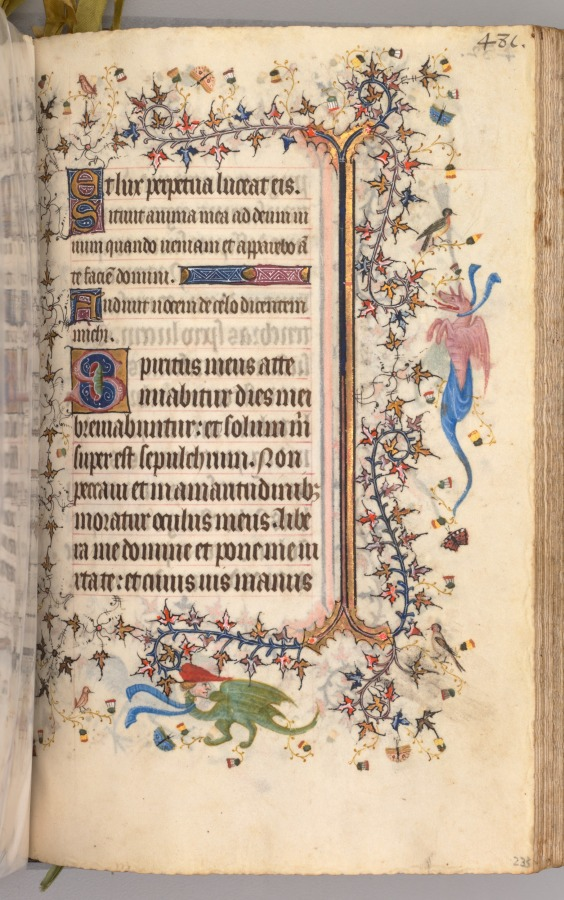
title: Hours of Charles the Noble, King of Navarre (1361-1425): fol. 234r, Text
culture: France, Paris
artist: Master of the Brussels Initials and Associates (French)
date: c. 1405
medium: ink, tempera, and gold on vellum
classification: Bound Volume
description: This precious volume was obviously highly prized by its owner, the French-born King of Navarre, who had his coat of arms painted on no less than twenty folios. Rather than directly commissioning this manuscript from a specific workshop, it seems that Charles the Noble acquired his book of hours -- perhaps ready-made for the luxury market -- while on a trip to Paris in 1404-05. A collaborative effort, six painting styles are evidenced within the pages of this codex, those of two Italians, two Frenchmen, and two Netherlanders. The painter who was responsible for the planning and decoration of the book, and who produced seventeen of the large miniatures, was a Bolognese artist known as the Master of the Brussels Initials. His principal assistant, responsible for most of the borders, was a Florentine who signed his name "Zecho" da Firenze on folio 208 verso.